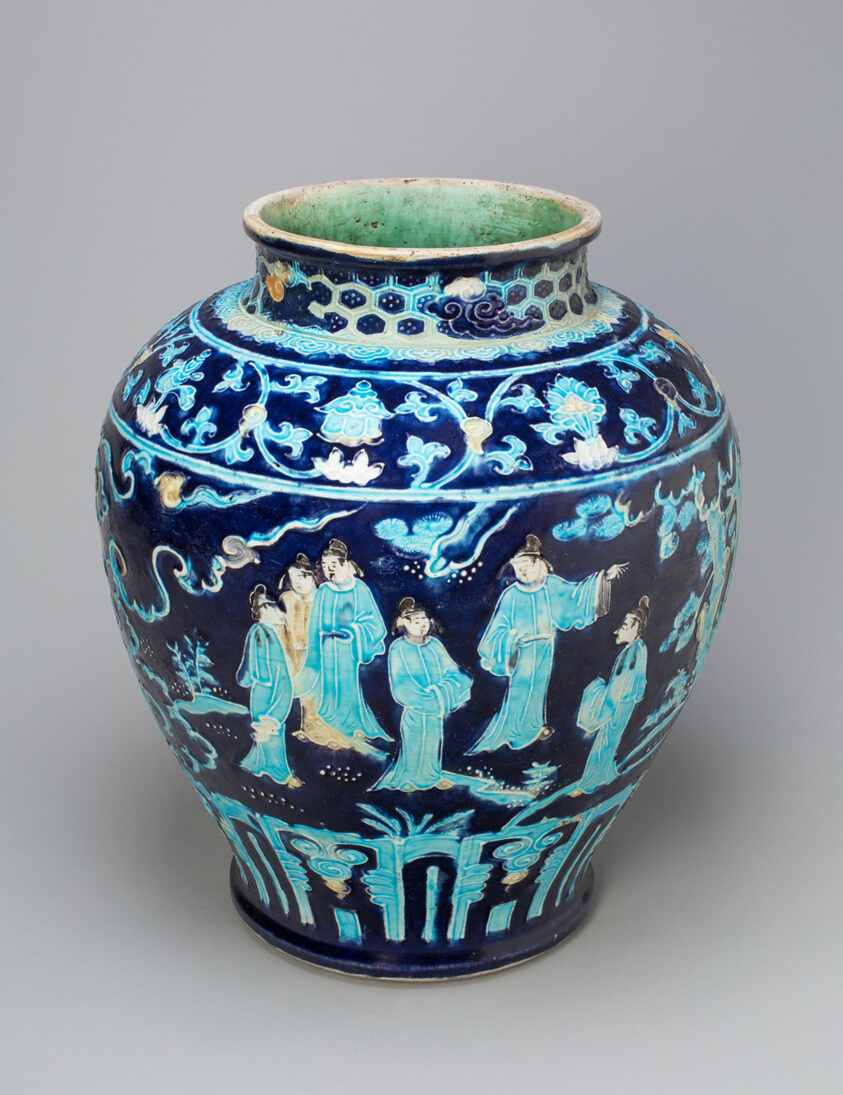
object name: Vessel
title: Jar with Scholars in Garden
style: Chinese (culture or style)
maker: China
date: Ming dynasty (1368–1644), 16th century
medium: Fahua ware; stoneware with biscuit outlines and underglaze molded decoration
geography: China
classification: porcelain; asian art; ceramics; vessel